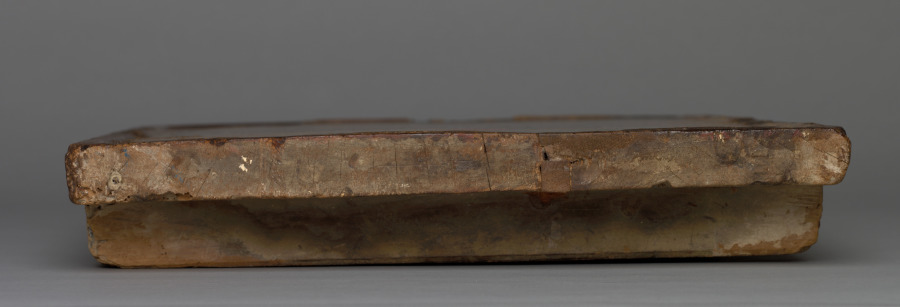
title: Icon of the New Testament Trinity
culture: Byzantium, Constantinople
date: c. 1450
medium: Tempera and gold on wood panel (poplar)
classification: Painting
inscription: Ο ΠΑΛΑΙΟC ΤΗΩ- God the Father as Christ in old age on right identified on either side of his head in gold, outlined in red.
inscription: ΤΟ ΑΙΟΝ ΠΝΑ- The Holy Spirit, identified by dove in gold outlined in red.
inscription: ΙΩCHΦ Ο ΠΟΙΗΤΗC- St. Joseph the Hymnographer identified on the left by gold letters, outlined in red.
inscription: ΚΟCΜ Ο ΠΟΙΗΤΗC- St. Kosmas the Hymnopgrapher identified on the right in gold letters in red outline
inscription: "'together with...you my God' and 'your dominion" in Scroll of Kosmas on the right.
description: This icon depicts an important subject in Orthodox Christian art, the three corresponding figures of the single godhead known as the Holy Trinity. The Trinity is represented here in a composition known as the “New Testament Trinity,” which features Christ and God the Father seated on a bench with a dove representing the Holy Spirit between them. The central field is occupied by a large wooden throne with gold highlights on which Christ (left) and the Ancient of the Days (God the Father as Christ in old age) are seated. The Holy Spirit, in the form of a dove, hovers within an eight-pointed star that signifies the eighth day, the future eon. On either side of the Trinity are two hymnographers, authors of hymns of praise, both identified by gold letters outlined in red—Saint Kosmas (about 675–752) on the left and Saint Joseph (about 812/818–about 886) on the right. They both suspend scrolls from round-arched windows. The icon likely was part of a church templon, the barrier that separated the nave from the sanctuary in an Orthodox church. It is not signed or dated; however, careful analysis of the painting’s style and technique places it in Constantinople around 1450, just prior to the city’s fall to the Ottomans in 1453. It represents a moment when Byzantine painting reached a brilliant crescendo.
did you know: More than just a breakfast food, eggs are used to make the tempera paint used in this painting.